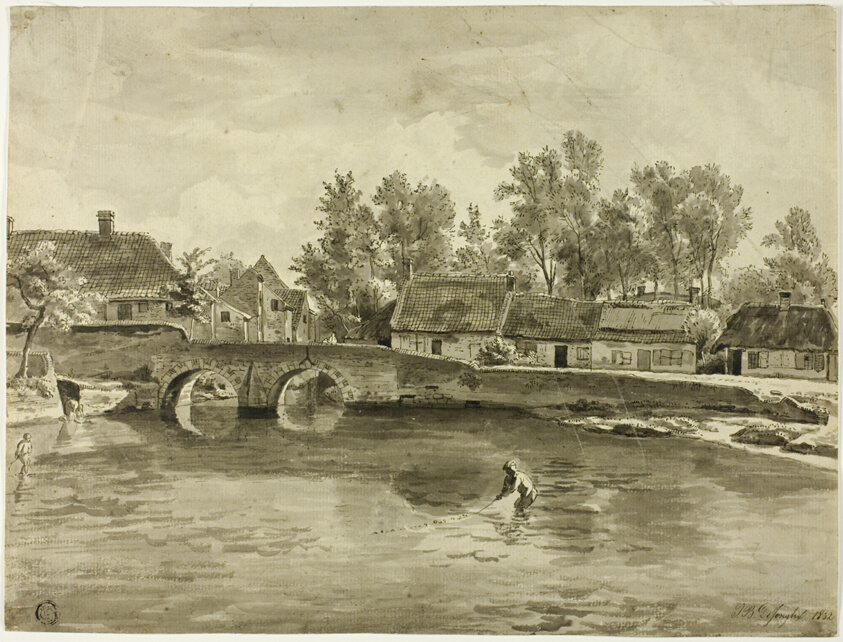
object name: Drawing and Watercolor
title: Man Fishing in River Near Village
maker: Jan Baptiste de Johghe; Flemish, 1785-1844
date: 1832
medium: Pen and brown ink, with brush and brown and gray wash, on ivory laid paper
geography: Flanders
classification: ink or chalk wash; drawings (visual works); prints and drawing